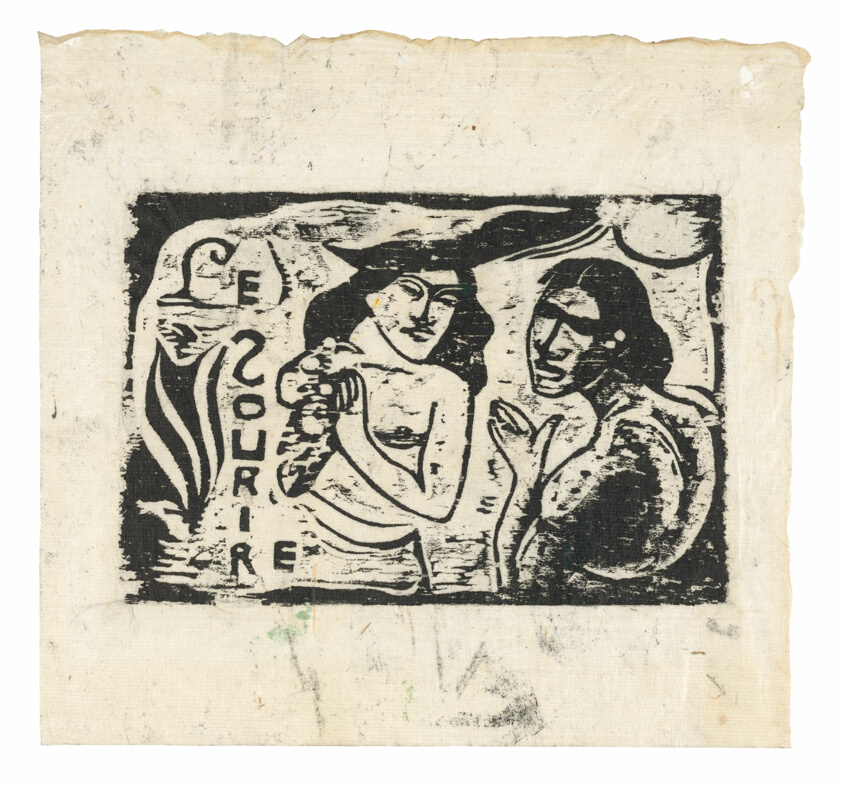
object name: Print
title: Two Women Chattering, headpiece for Le Sourire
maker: Paul Gauguin (French, 1848-1903)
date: 1900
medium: Wood-block print in black ink on thin ivory laid Japanese paper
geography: France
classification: woodcut; print; prints and drawing